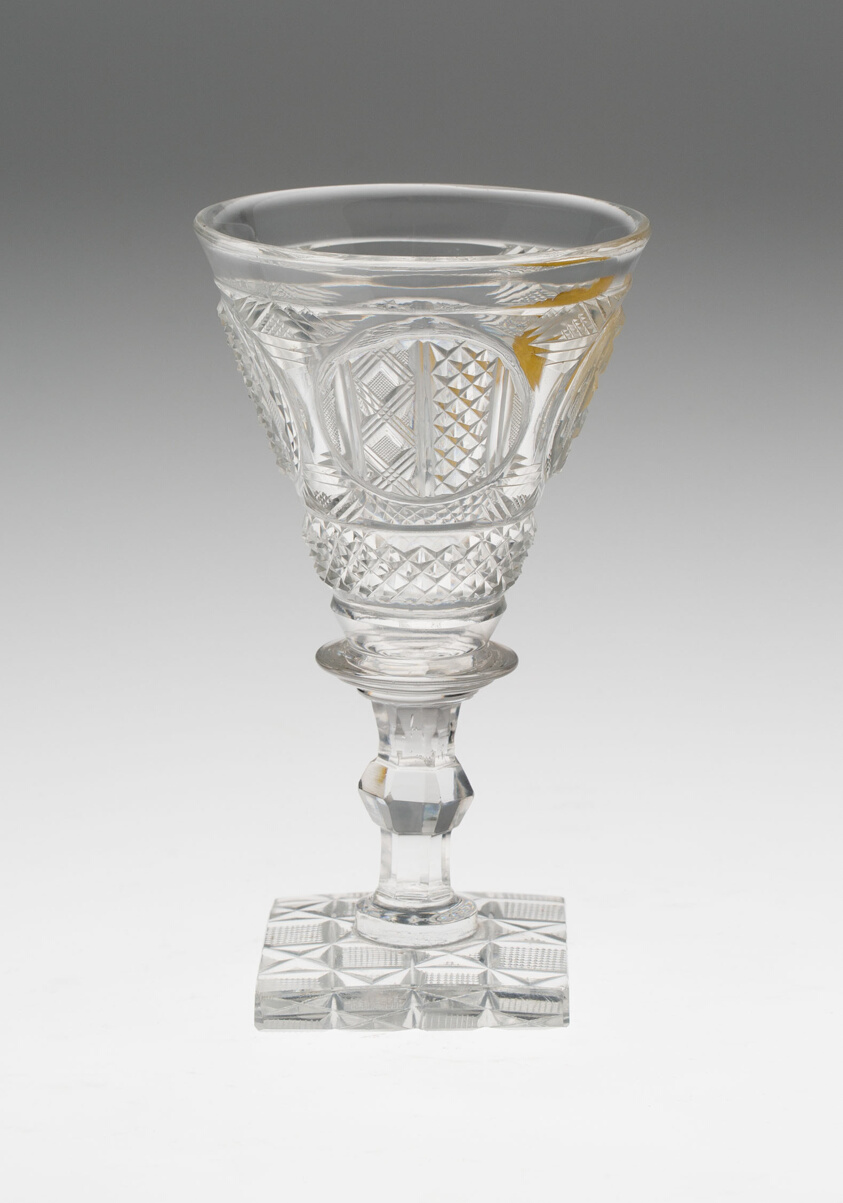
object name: Glass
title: Wine Glass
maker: Netherlands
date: 18th century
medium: Glass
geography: Netherlands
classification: drinking vessel; glass; european decorative arts